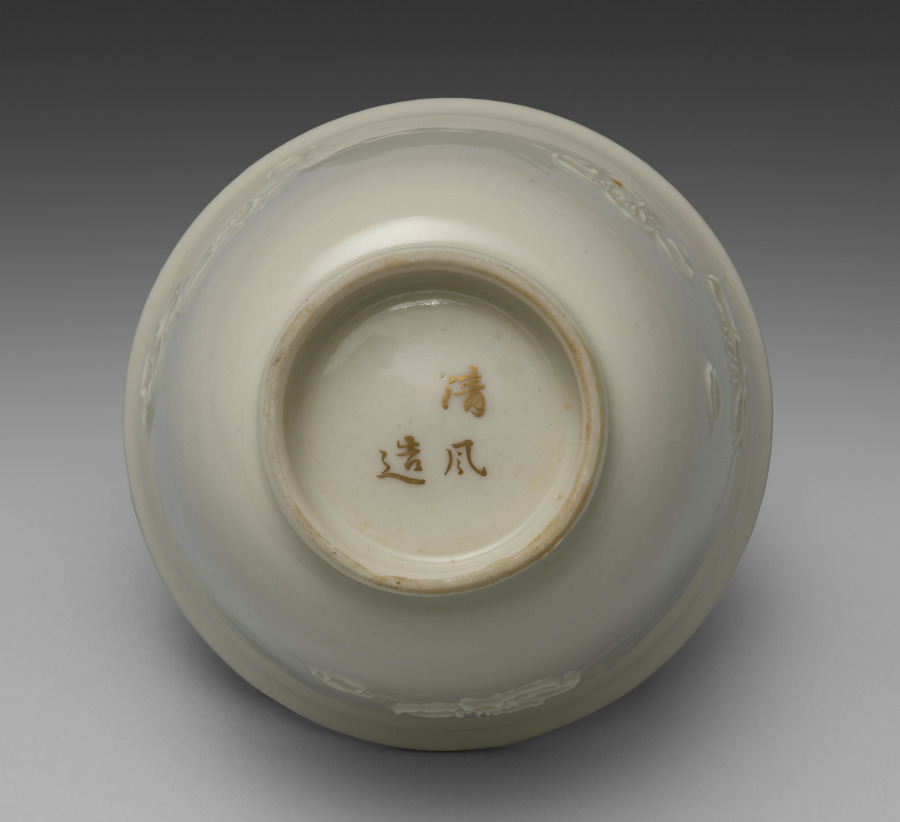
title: Drinking Cup from Dining Set with Plum Blossoms and Cracked-Ice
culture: Japan, Meiji period (1868–1912)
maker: Seifū Yohei II (Japanese, 1844–1878)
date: c. 1875–78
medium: Porcelain with molded designs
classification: Ceramic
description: Each item in this set has a delicate low-relief design of flowering plum branches over scattered, intersecting lines meant to resemble the cracked-ice surface of a frozen body of water and is signed on the base in gold pigment. While Yohei II produced many fine works in underglaze blue, like those produced by Kiyomizu Shichibei, he also made works in quite different styles later in his career, from the early 1870 s. In 1873, he was appointed purveyor to the Industrial Center of Kyoto Prefecture, a designation associated with Kyoto’s efforts to reach an international market through the port of Kobe; and from 1875 until his death, he was involved in national-level projects to present Japanese ceramics across the world. It was during this period that Yohei III was apprenticed to Yohei II, and it has been suggested that this set may in fact be an early example of Yohei III’s work, which he signed with his teacher’s name. Decorated with flowers resembling Japanese textile motifs, the set calls to mind the design of Yohei II’s pair of vases with plum blossoms in the Victoria and Albert Museum. Here, the elaborate trees created for a formal public exhibition setting have been translated into the approachable blossoms of the genteel domestic environment. While the designs are consistent across the pieces, each raised flower petal and pistil and each incised line in the ice was done by hand, so the cups, bowls, and dishes are similar yet unique. The bottoms of two boxes once identified the set’s owner, but the information has been deliberately obscured with black ink. However, inscriptions still visible appear to indicate two occasions, once at the end of July 1886 , and once again in June 1916 , when parts of the set were requested from Hokura in Niigata Prefecture. The location corresponds to a neighborhood in the present-day city of Jōetsu. The surname Tsuji 辻 also appears on a paper tag affixed to one of the box cloths. Future research may possibly reveal more about their provenance. A vase by Yohei III in a private collection combines the formal grandeur of the Yohei II vases in the Victoria and Albert Museum with the gentler design of this dining set, placing flowering plum trees against soft, scalloped-edge clouds resembling those in golden screens.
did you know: The dining wares have a creamy white coloration that the four boxes containing them identify as Korean in style.